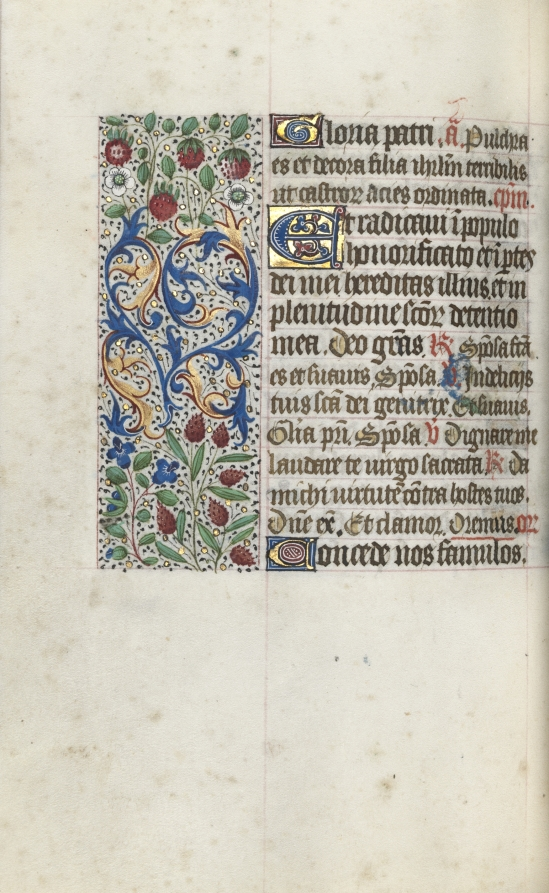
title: Book of Hours (Use of Rouen): fol. 69v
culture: France, Rouen, 15th century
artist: Master of the Geneva Latini (French, active Rouen, 1460–80)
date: c. 1470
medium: ink, tempera, and gold on vellum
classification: Bound Volume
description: In the late 1400s and early 1500s Rouen was an established and important center of book production. The city’s cathedral had a wealthy chapter that spent large sums of money to commission books and to maintain its extensive library. The stationers and booksellers would have likely been concentrated in or near the cathedral precinct. This artist, named after a manuscript now in Geneva, was Rouen’s principal illuminator during the second half of the 1400s.